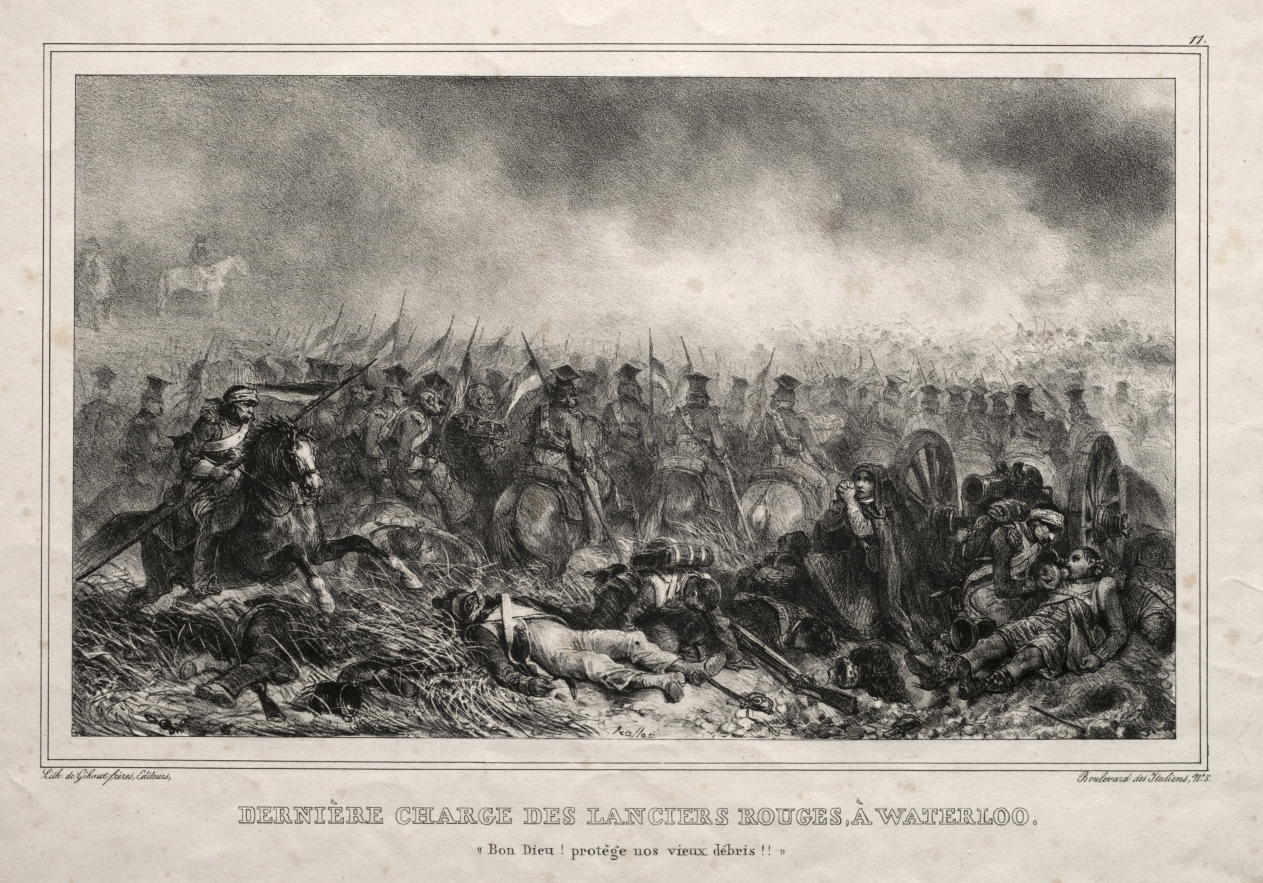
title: Dernière Charge des Lanciers Rouges à Waterloo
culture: France, 19th century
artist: Auguste Raffet (French, 1804–1860)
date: c. 1834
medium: lithograph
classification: Print